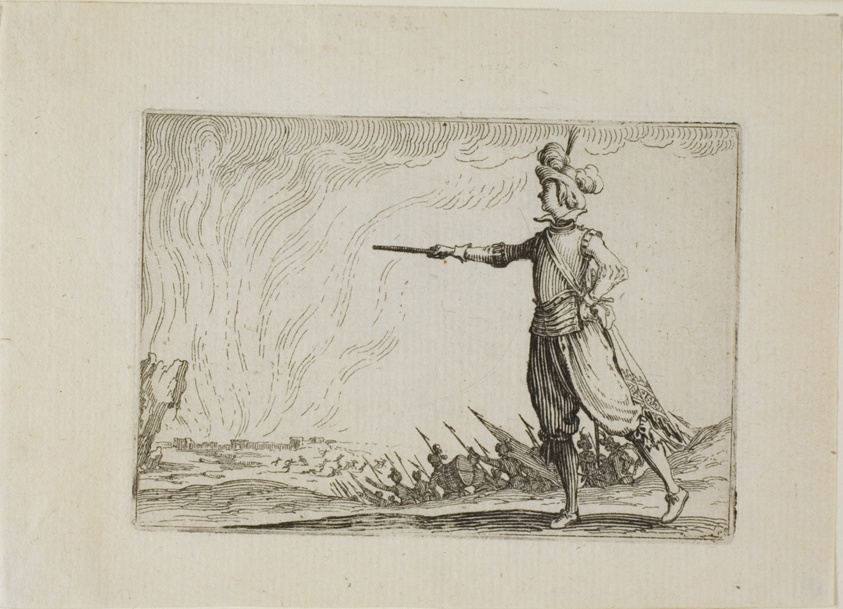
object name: Print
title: The Commander on Foot, from The Caprices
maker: Jacques Callot (French, 1592-1635)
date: c. 1622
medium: Etching on ivory laid paper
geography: France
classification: etching; print; prints and drawing